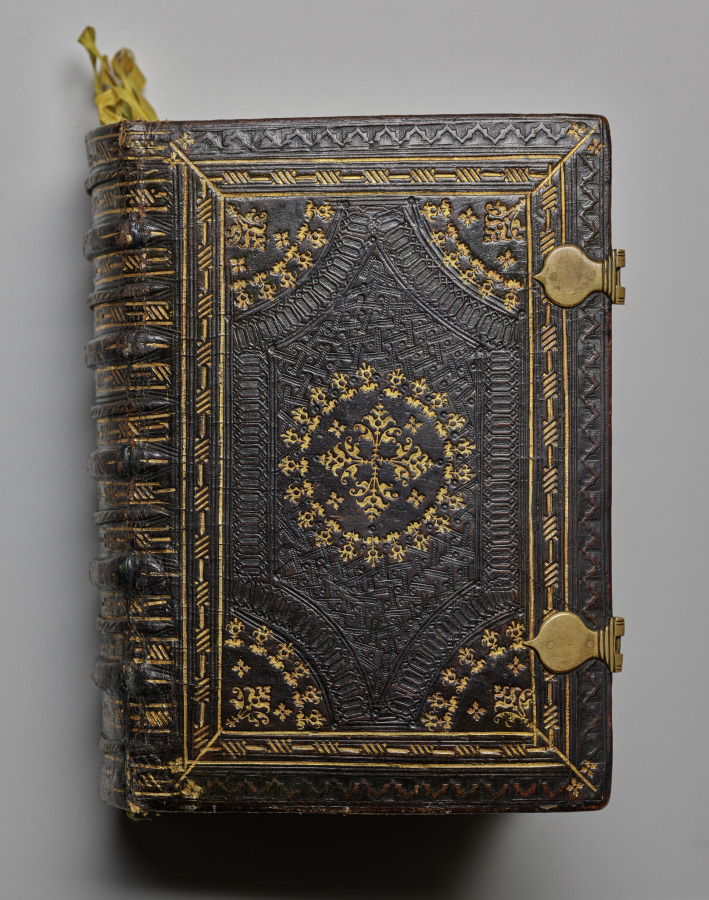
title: Hours of Charles the Noble, King of Navarre (1361-1425)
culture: France, Paris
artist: Master of the Brussels Initials and Associates (French)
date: c. 1404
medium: ink, tempera, and gold on vellum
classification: Bound Volume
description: Creating a book of hours was an arduous and costly process. These books were made from vellum, animal skins that were laboriously prepared in a multistep process. The texts were written with a quill pen and the illustrations were hand painted using water-based pigments. Gold was added for a look of great luxury. Such a book would take years to create, making these valuable objects unique.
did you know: King Charles the Noble likely used this book of hours at his royal castle of Olite in Navarra in northern Spain.